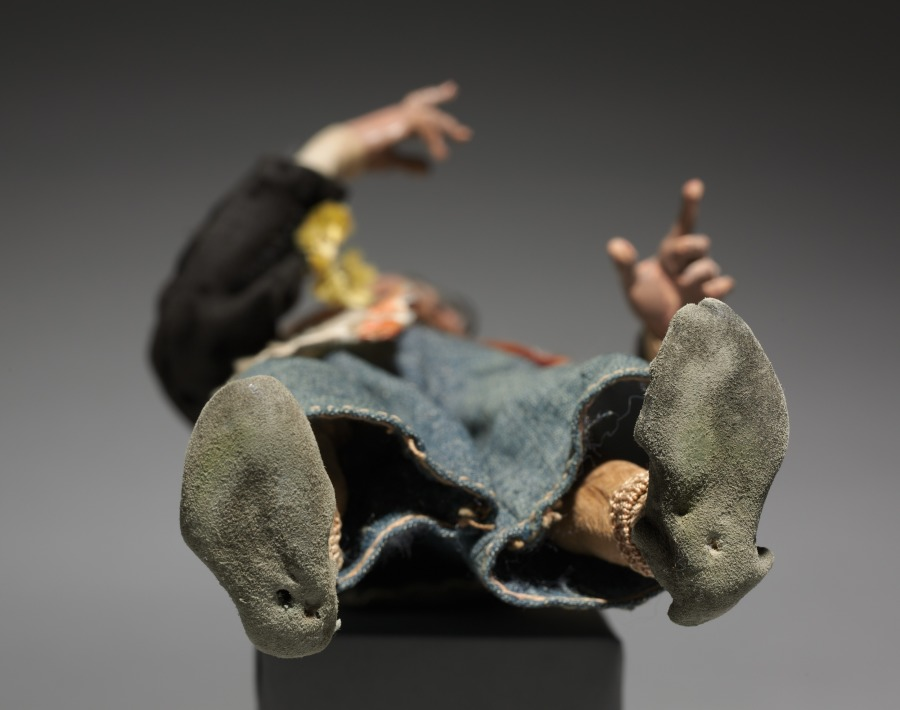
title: Figure from a Crèche: Standing Man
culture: Italy, Naples, late 18th-early 19th century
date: 1780–1830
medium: painted wood and terracotta with various textiles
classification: Sculpture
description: The practice of creating scenes of the Nativity for the home dates from the early 1700s in Italy, where people began to set up doll-like figures of about a foot or less in height. The custom was particularly popular in Naples around 1800, where crèche scenes (crèche means cradle, or crib) included many figures, whose heads and hands of painted terracotta, stuffed cloth bodies, and clothing adapted from contemporary local costumes gave them an amazingly realistic character. Representations of the birth of Jesus can be traced to the first few centuries of Christianity. Both living creatures and sculptural depictions of them were used from early times. By the late middle ages it was customary to create life-size figures of wood or stone, naturalistically painted, to represent the characters who participated in the events of Jesus's early life. These sculptures were then arranged in scenes illustrating one or both of the most important of these events, the Adoration of the Shepherds and the Adoration of the Magi-the three kings from the East who came to pay homage to the Christ child. Used in churches, these large figures were especially popular in Italy, Central Europe, Spain, and Portugal.